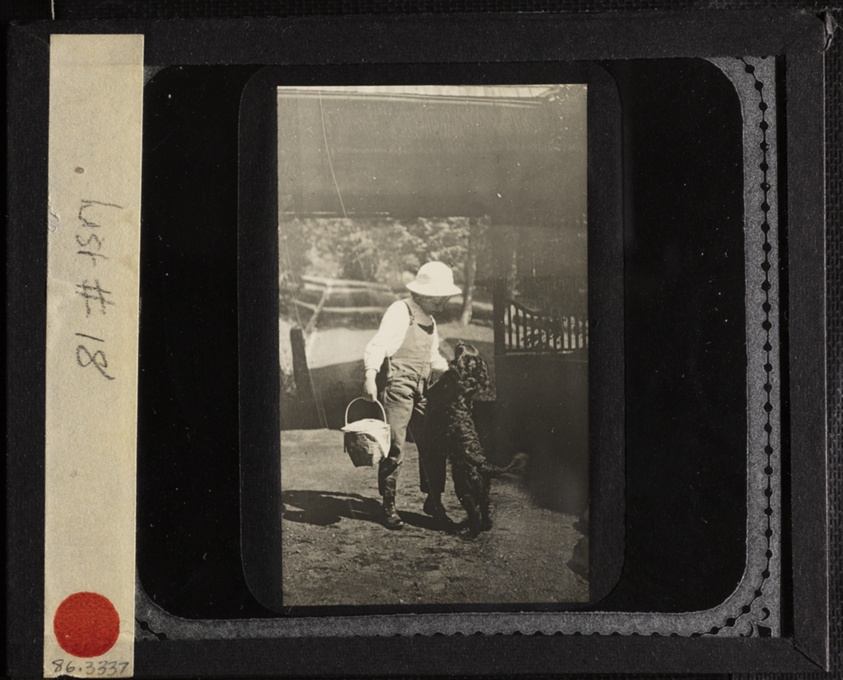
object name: Photograph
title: Untitled (Niece Elizabeth with "Inky" at Oaklawn)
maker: Alfred Stieglitz (American, 1864–1946)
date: c. 1903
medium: Lantern slide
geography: United States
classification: lantern slide (glass); negative/transparency; photography; photograph